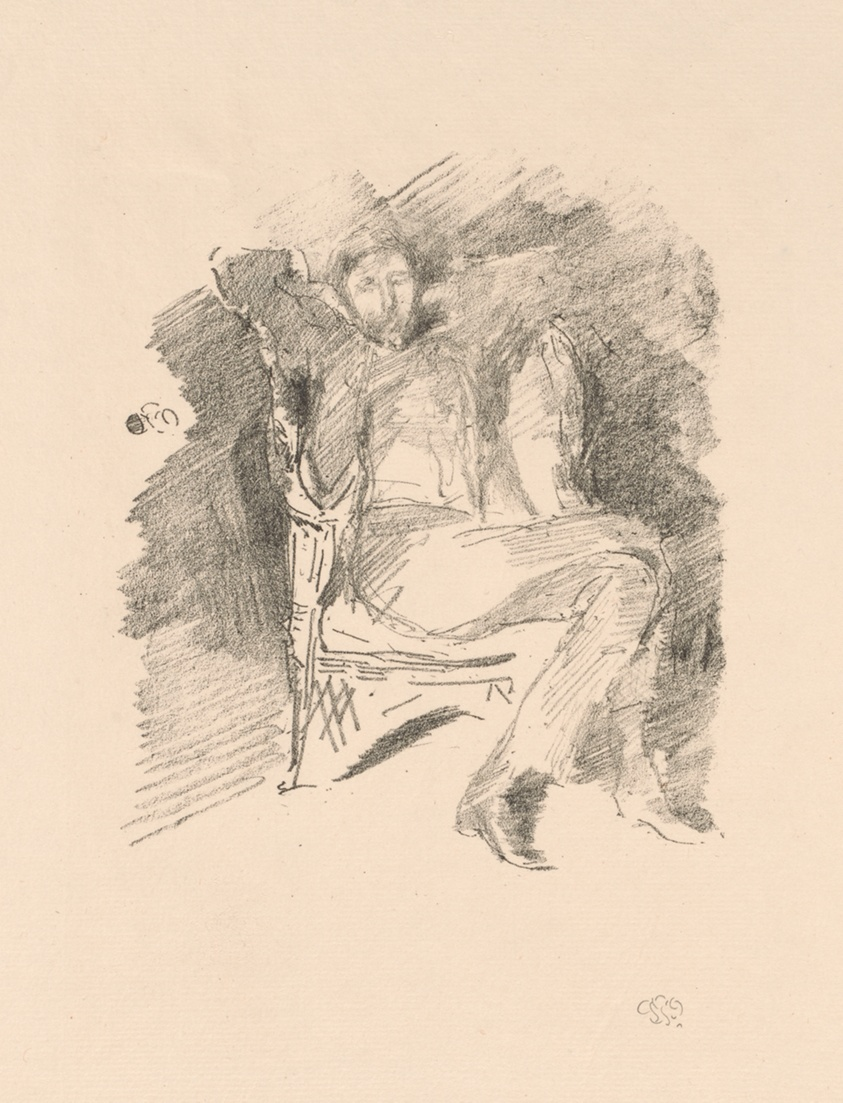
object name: Print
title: Firelight: Joseph Pennell, No. 1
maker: James McNeill Whistler (American, 1834-1903)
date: 1896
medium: Transfer lithograph in black on cream laid paper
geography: United States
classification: transfer lithograph; lithograph; print; prints and drawing; paper